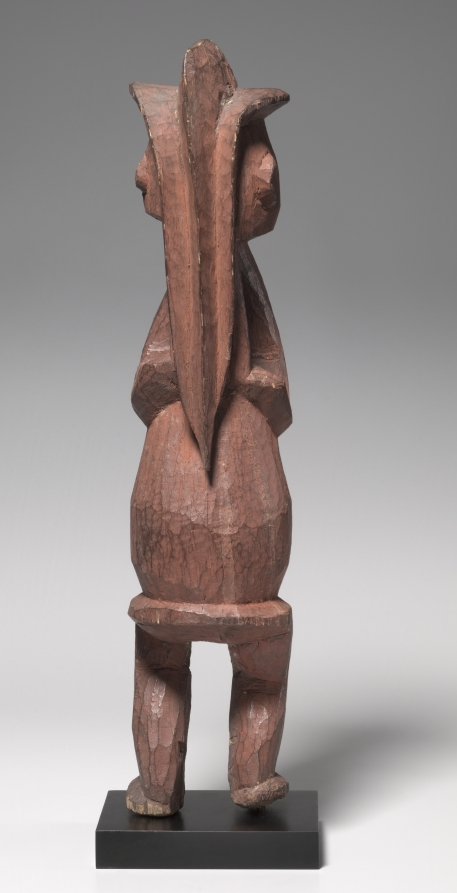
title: Male Figure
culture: Africa, Central Africa, Democratic Republic of Congo, Hungaan-style maker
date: mid- to late 1800s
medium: Wood and colorant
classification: Sculpture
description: Hungaan figures of this size served as guardians of ritual shrines and functioned in rituals to promote fertility, guarantee well-being, and ensure longevity. The striking crested hairstyle imitates a real coiffure or a wig, indicative of status and prestige. The hands supporting the chin identify the figure as a chief who is immersed in thought and contemplation, pondering over his responsibilities.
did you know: The red powdery surface of this figure mimics a red body adornment that mixed ground camwood with palm oil.